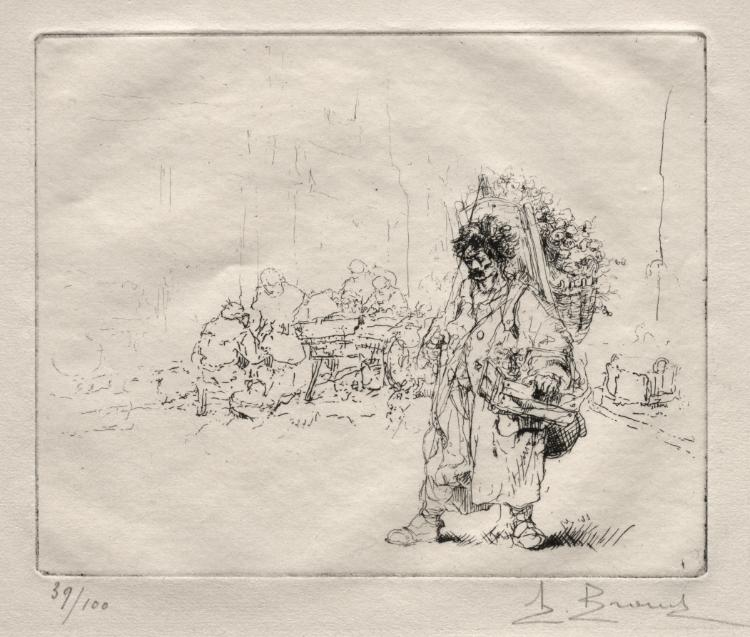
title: Marchand a la Hotte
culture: France, 20th century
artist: Auguste Brouet (French, 1872–1941)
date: c. 1902–41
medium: etching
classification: Print